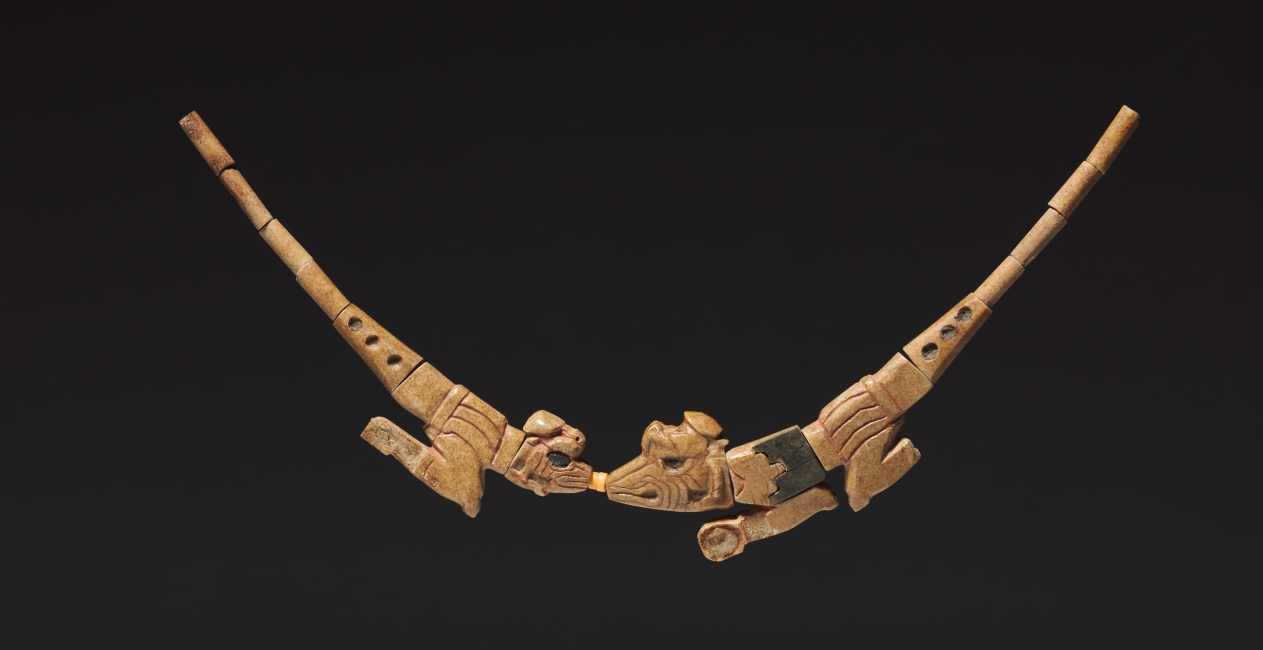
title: Necklace with Lizards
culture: Peru, Moche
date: 550–800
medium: stone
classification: Jewelry